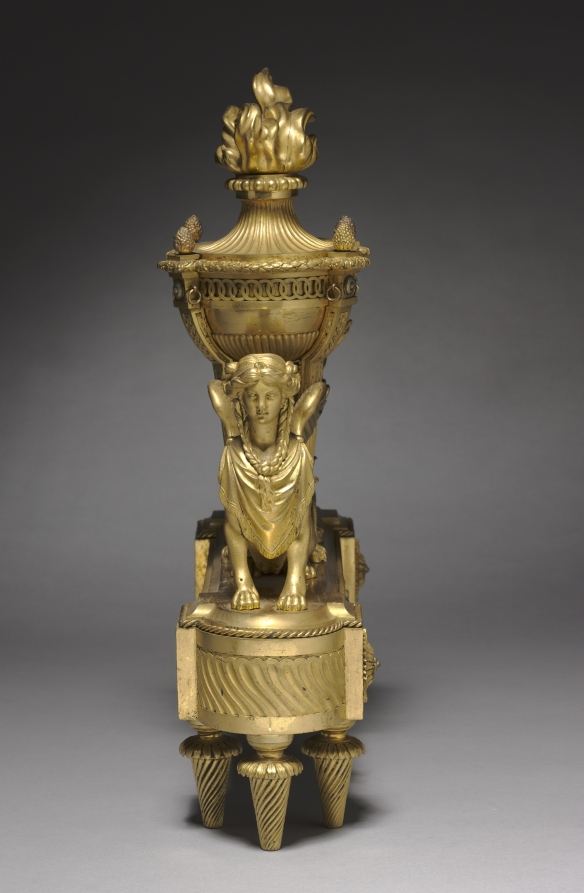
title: Firedog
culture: France, 18th century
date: c. 1785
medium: gilt bronze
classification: Furniture and woodwork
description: Although Louis Jean Desprez’s design was largely inspired by tombs in southern Italy, he added sphinxes in his print Tomb with Sphinx due to his fascination with ancient Egypt. Ancient Egyptians saw the sphinx, a half-human, half-lion mythological creature, as a protector of tombs and temples. The pair of andirons, decorative supports for a hearth’s firewood, alongside Tomb with Sphinx, highlight the growing interest in Egyptomania during the 1700s. Interestingly, the andirons portray ancient Greek and Roman interpretations of the sphinx. Most Europeans learned of ancient Egypt by studying Egyptomania in ancient Roman and Greek art and architecture or Egyptian antiquities brought over by the Romans.